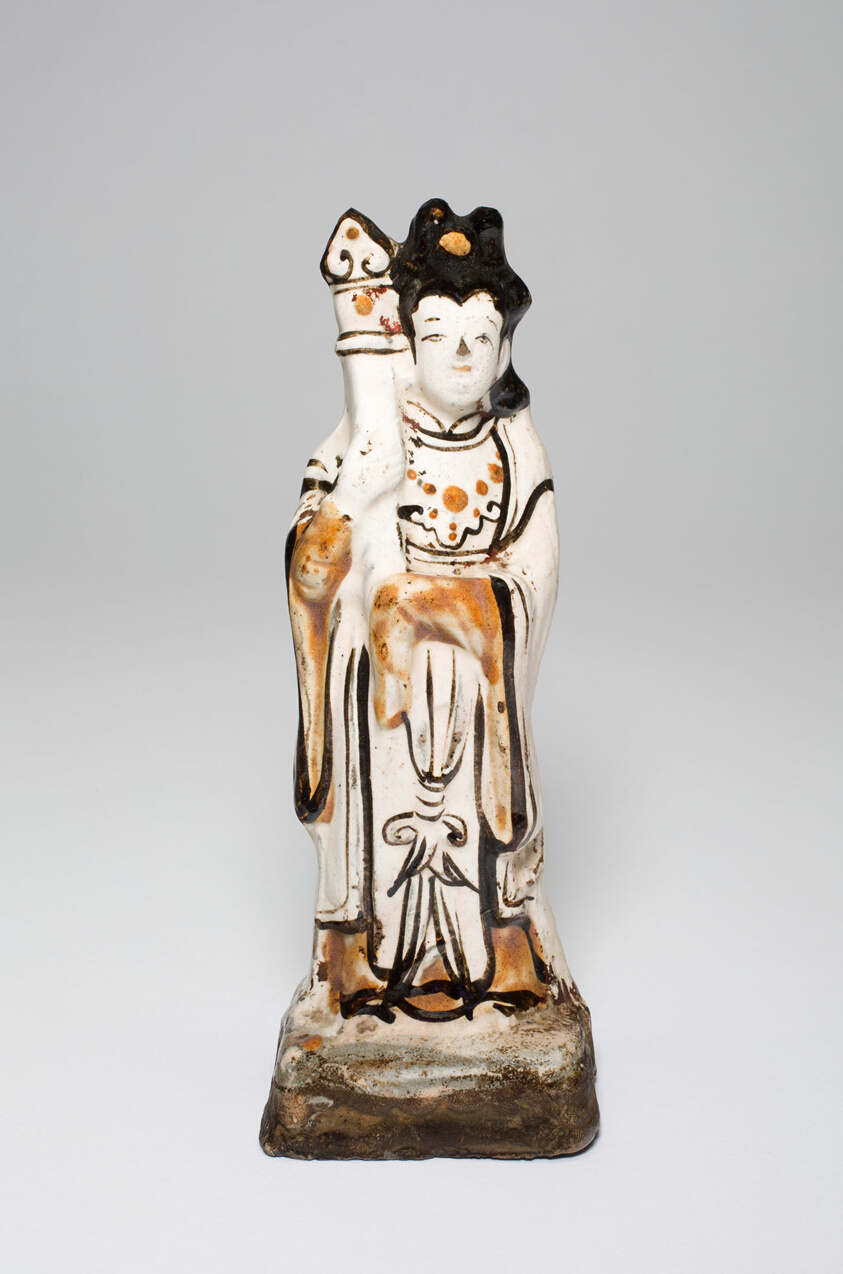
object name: Sculpture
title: Standing Figure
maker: China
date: Ming dynasty (1368–1644)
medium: Cizhou ware; slip-coated stoneware with iron brown glaze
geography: China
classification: stoneware; asian art; ceramics